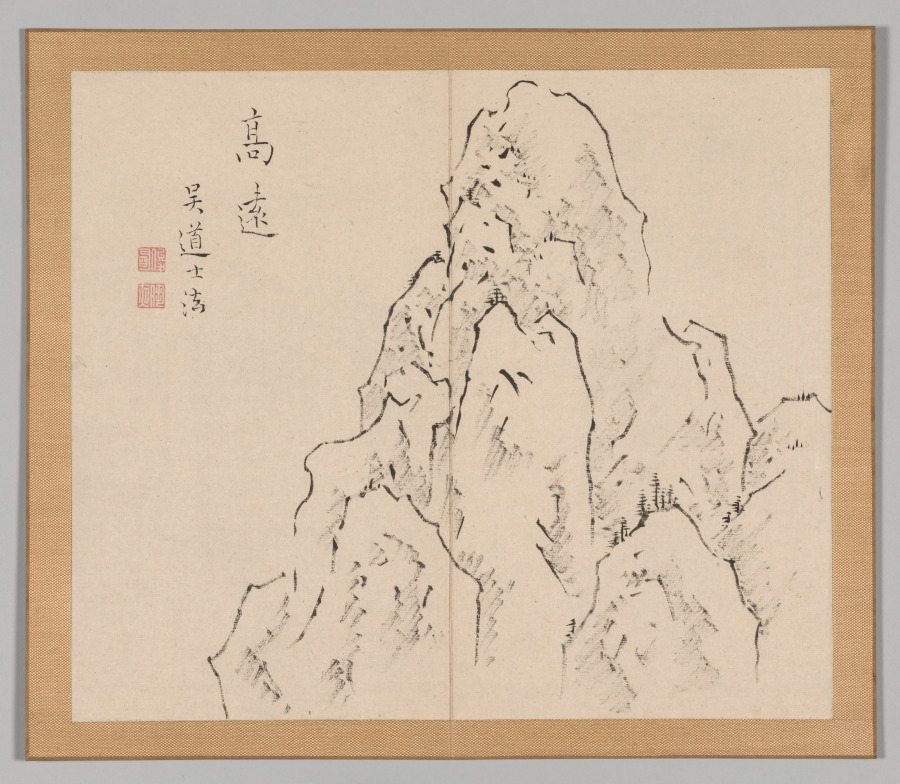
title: Reverberations of Taiga, Volume 2 (leaf 7)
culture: Japan, Edo period (1615–1868)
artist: Aoki Shukuya (Japanese, d. 1802)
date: mid-1700s–1802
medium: double-leaf from a pair of albums; ink and light color on paper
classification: Portfolio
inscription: 高遠/ 吳道子法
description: Aoki Shukuya was a top student of painter Ike Taiga and took responsibility for Taiga’s stylistic legacy. A painting album by Taiga, part of which survives today in Kyoto in hanging scroll format, served as the source for this painting by Shukuya and the matching designs from a set of wood-block–printed volumes published in 1804. The postscript to the books, written and carved by the scholar Minagawa Kien (皆川淇園) (1735–1807), explains that Taiga produced the original album for his wife and fellow painter Tokuyama Gyokuran (徳山玉瀾) (1727/28–1784). The third volume of the wood-block–printed books contains an image of a tall mountain peak with the text “high and distant” (高遠) to its left. Shukuya’s version of this design includes additional words—he wrote that the design represents the method of Wu Daozi (吳道子) (Chinese, about 689–759). Revered as one of the most important Tang-dynasty painters, Wu Daozi’s work is known today only through copies.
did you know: Traditionally, young painters in Japan began their studies with an established master painter. The master's compositions invariably became models that the apprentice copied to learn various ink and brush techniques.